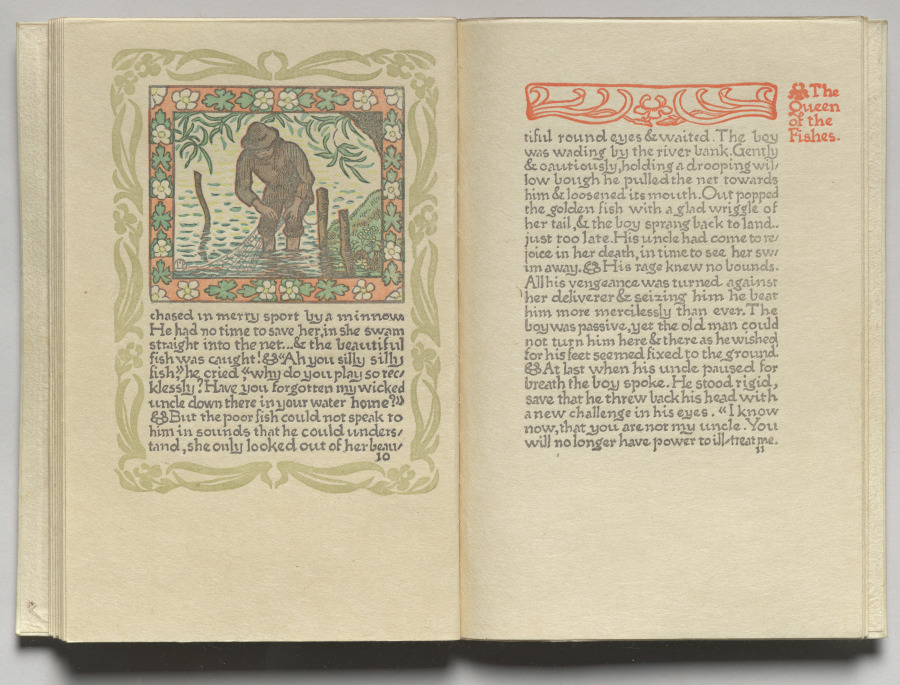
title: The Queen of the Fishes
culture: England, 19th century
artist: Lucien Pissarro (British, 1863–1944)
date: 1894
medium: Bound volume with color wood-engraved illustrations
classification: Bound Volume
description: “The Queen of the Fishes” is a French fairy tale about two mistreated children who turn into a fish and an oak tree. This edition was the first book published by the Eragny Press, the private firm of Lucien Pissarro, son of impressionist painter Camille Pissarro. Following the example of William Morris, Lucien wanted to return to the careful design and high-quality materials of early printed books. He and his wife, Esther Bensusan Pissarro, made this publication almost entirely by hand, including designing and engraving all the illustrations and ornaments.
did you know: Lucian Pissarro was a son of Impressionist painter Camille Pissarro.